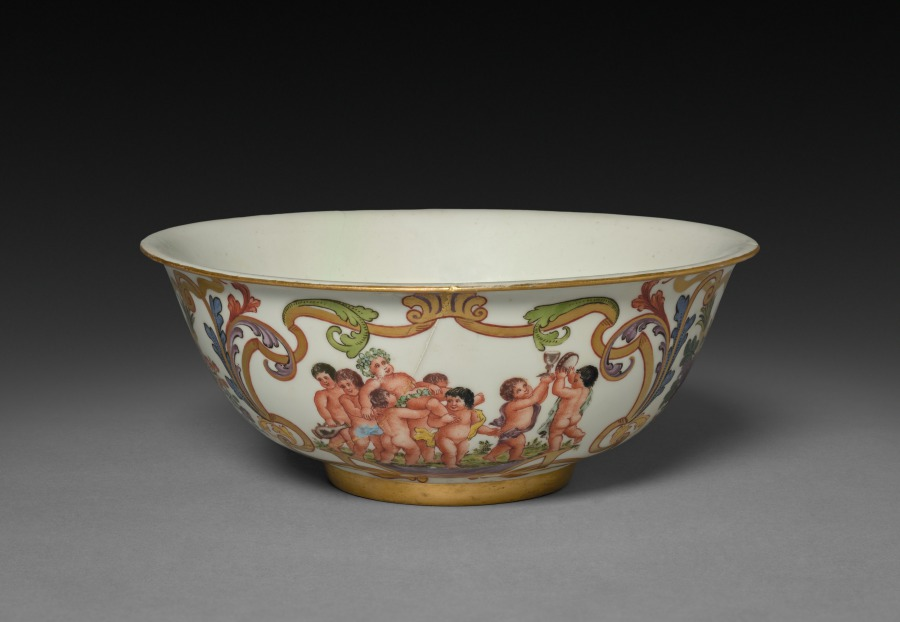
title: Bowl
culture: Austria (?), Vienna (?), 18th century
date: c. 1730–1740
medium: porcelain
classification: Ceramic